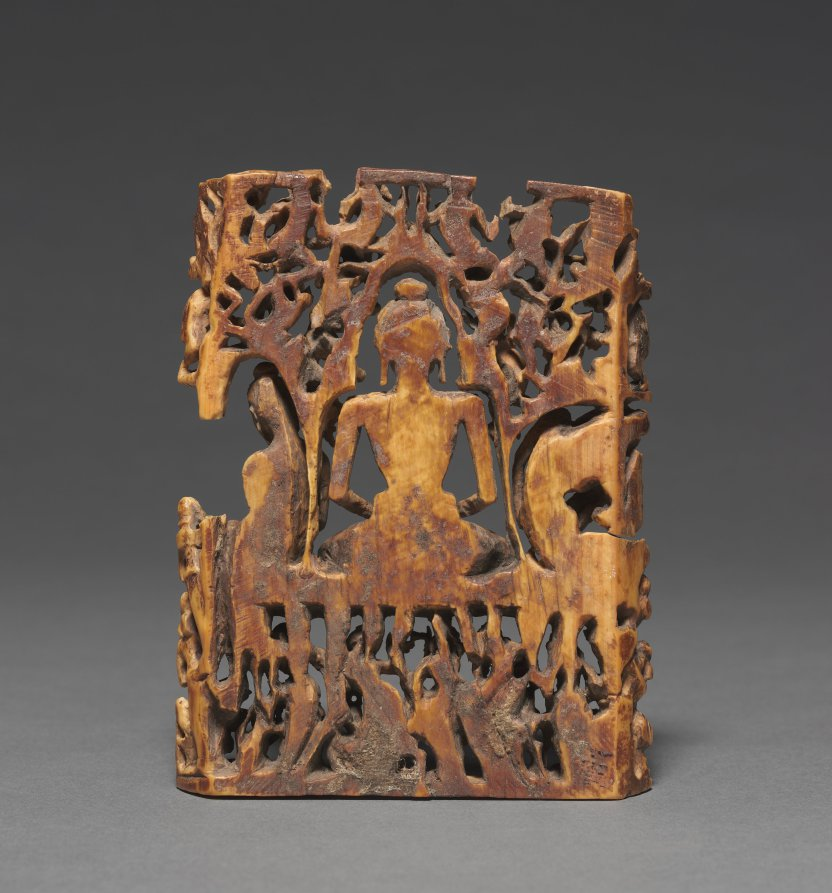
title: Fasting Buddha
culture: India, Kashmir, 8th century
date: 700s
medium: ivory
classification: Ivory